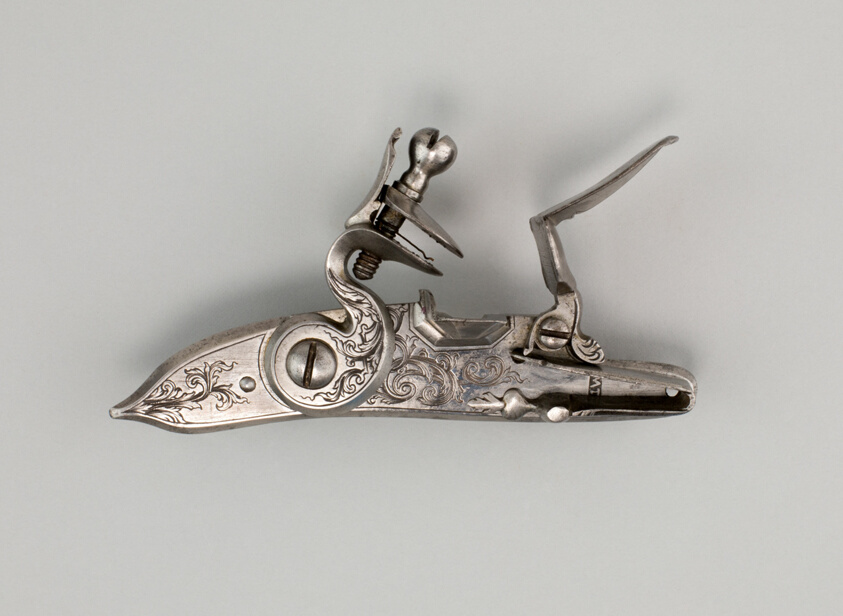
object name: Arms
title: Flintlock of a Gun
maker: German; Locksmith: M T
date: late 19th century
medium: Steel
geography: Europe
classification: firearm-accessory; arms; arms and armor